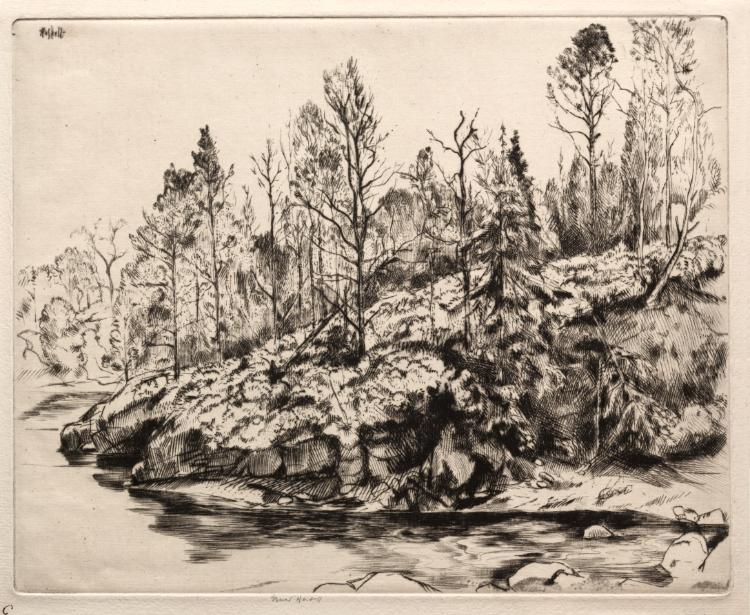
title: Autumnal Point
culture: America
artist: Ernest Haskell (American, 1876–1925)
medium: drypoint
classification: Print